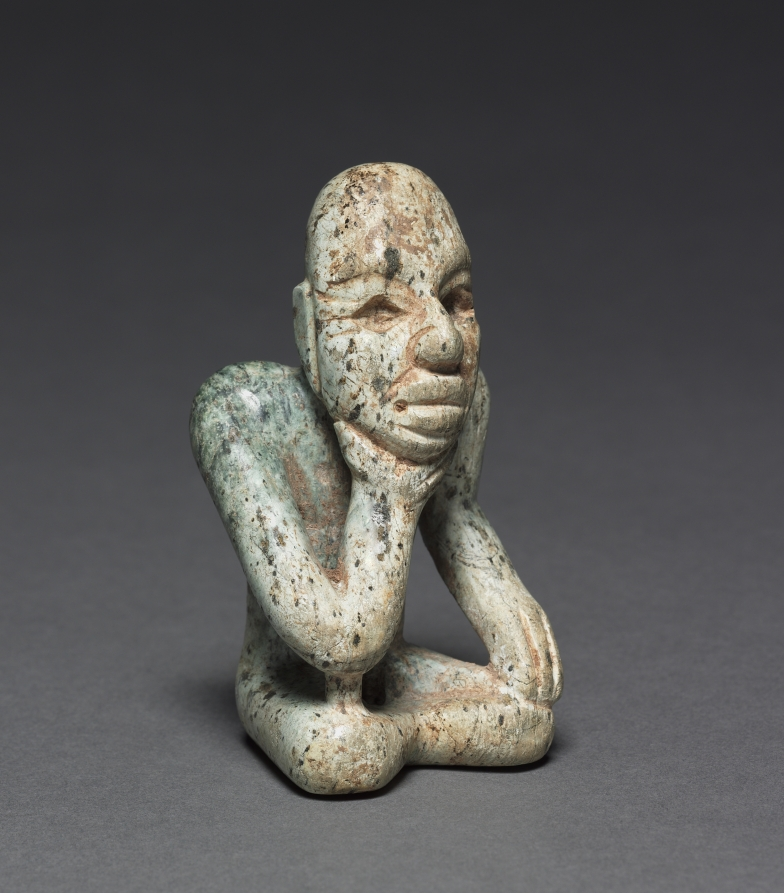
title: Seated Figure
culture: Mesoamerica, Mexico, Olmec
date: 1200–300 BCE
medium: jade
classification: Jade